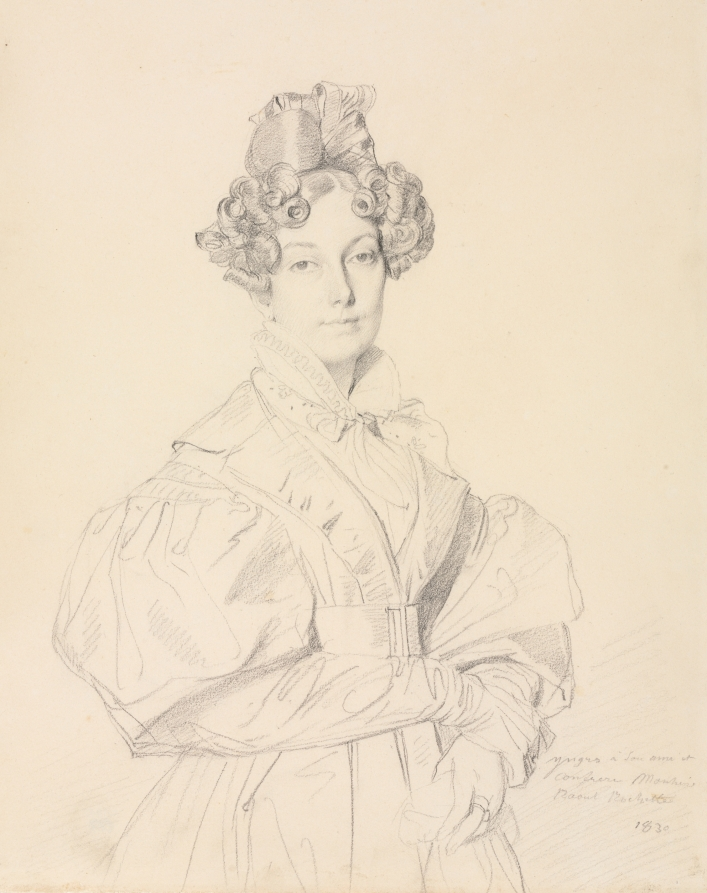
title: Madame Désiré Raoul-Rochette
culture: France, 19th century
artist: Jean-Auguste-Dominique Ingres (French, 1780–1867)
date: 1830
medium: graphite on cream wove paper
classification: Drawing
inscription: inscribed, lower right, in graphite: Ingres à son ami et / confrere Monsieur / Raoul Rochette / 1830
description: While living in Rome, Jean-Auguste-Dominique Ingres began making commissioned graphite portraits as a way of providing additional income. He aspired to a career as a history painter, however, and made such works only as gifts for friends after achieving professional success. This sheet was a gift for its sitter's husband, a famous archaeologist to whom Ingres dedicated it at lower right. The subject of the drawing, Antoinette-Claude Houdon, was the youngest daughter of Jean-Antoine Houdon (1741–1828), an important 18th-century French sculptor. Using the style he developed for such works, the artist drew in stark, confident lines, with no apparent erasing or correction.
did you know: Ingres paid close attention to his sitter's costume: a fashionable open coat and dress with leg-of-mutton sleeves.